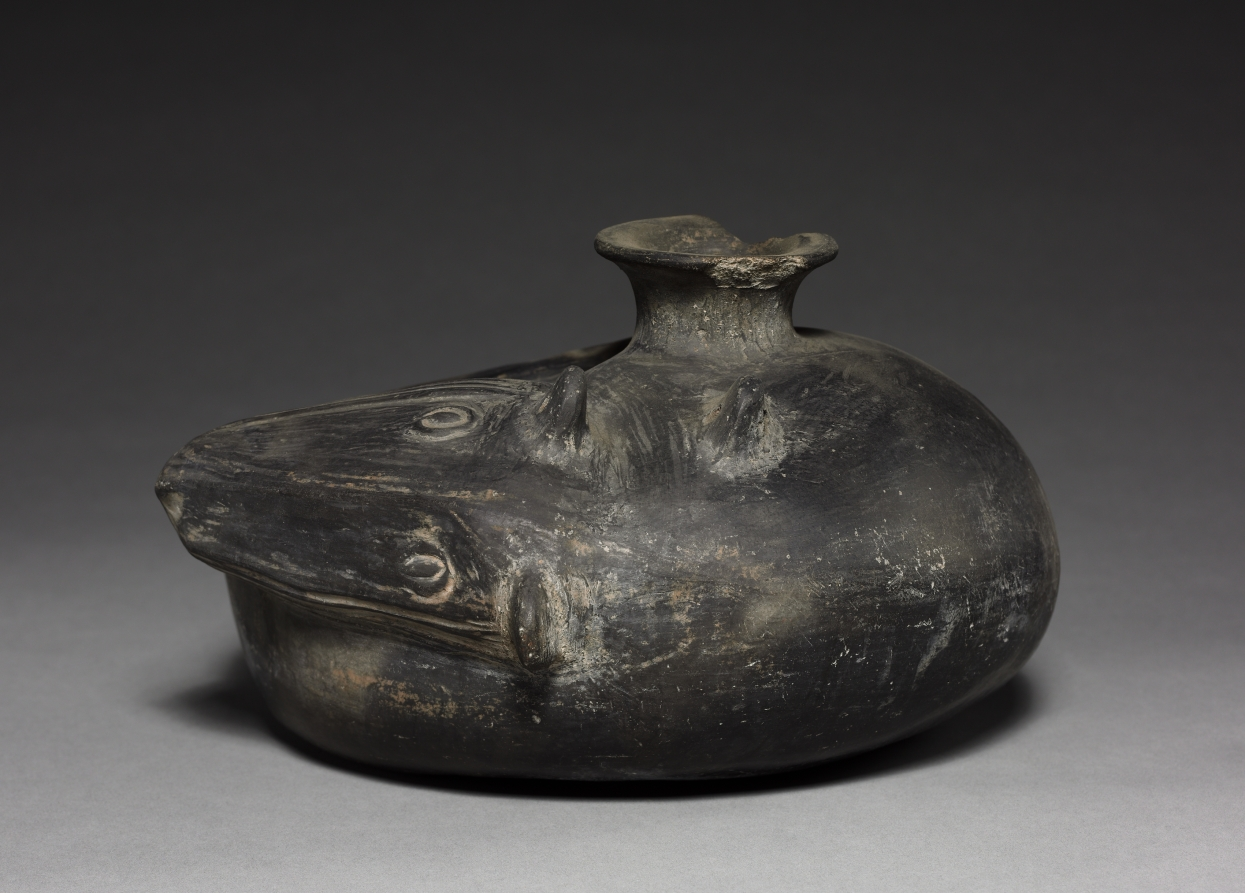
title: Bottle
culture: Peru, Chimú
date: 1300–1400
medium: pottery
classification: Ceramic